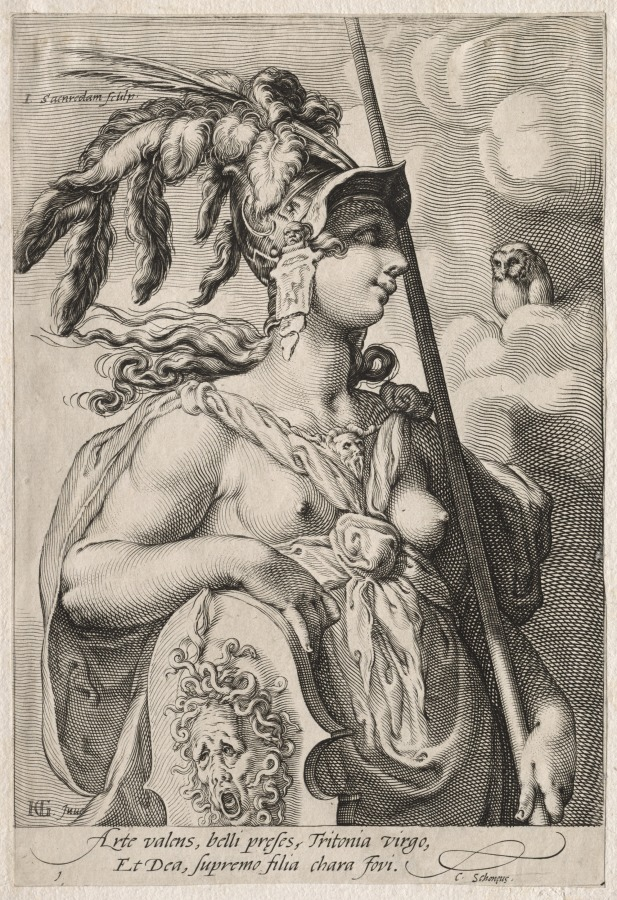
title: Three Goddesses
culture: Netherlands, 16th century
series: Three Goddesses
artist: Jan Saenredam (Dutch, 1565–1607)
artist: after Hendrick Goltzius (Dutch, 1558–1617)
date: c. 1595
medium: engraving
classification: Print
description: Goltzius popularized a style of engraving with mesmerizing patterns of curving, tapering, and crisscrossing lines; it was especially appreciated in the late 1500s. Designed for his pupil Saenredam to engrave, these prints depict the three goddesses from the tale of The Judgment of Paris, in which each claimed the golden apple awarded to the most beautiful. Jupiter deferred judgment to Paris, a mortal esteemed for his fair-mindedness. Juno and Athena tried to bribe Paris with an empire and skill in war, but Venus made him an offer he could not resist: Helen, the world’s most beautiful woman. The presentation of the deities in separate prints suggests that viewers may also play Paris’s role and decide themselves which goddess the artists made most beautiful.